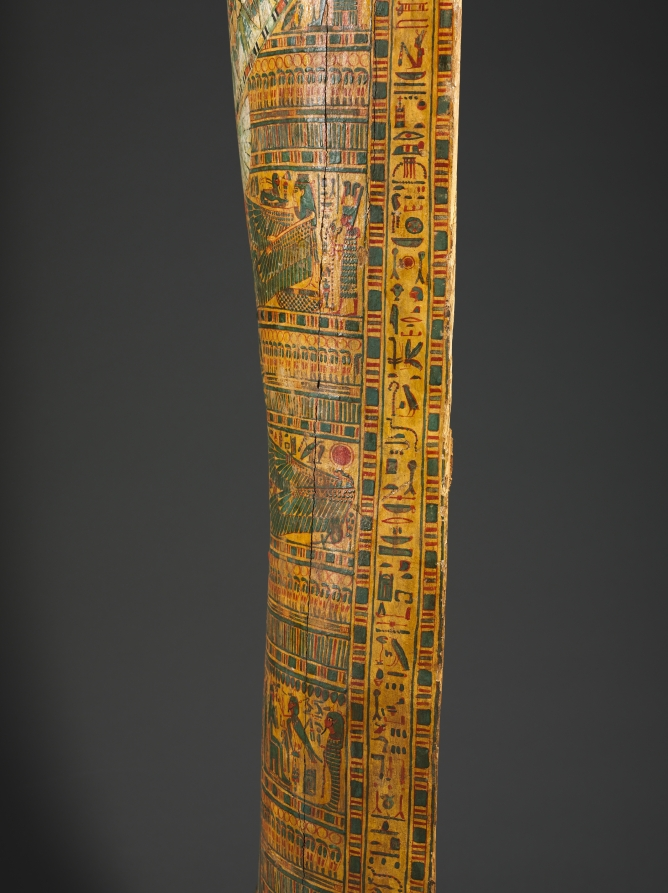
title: Coffin of Bakenmut (lid)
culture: Egypt, Thebes, Third Intermediate (1069–715 BCE), Dynasties 21–22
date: c. 1000–900 BCE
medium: gessoed and painted sycamore fig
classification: Funerary Equipment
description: The coffin of Bakenmut is one of the finest examples of painted wooden coffins made for the priests of Amen and their families at Thebes during Dynasty 21 and early Dynasty 22. The pharaohs of this time were no longer buried in the Valley of the Kings, but instead built tombs in the Delta, far to the north, where they resided. Security was lax in the Theban necropolis. The coffins and funerary goods of the wealthy citizens of Thebes were placed in unmarked and undecorated family tombs cut into the cliffs on the west bank of the Nile. All the care and detail that in more prosperous times were devoted to the decoration of the tomb chapel were now lavished on the elaborately painted coffins. Every available surface is crowded with religious scenes, images of funerary gods and goddesses, protective spells, and magical symbols. The deceased appears mummiform. An elaborate floral collar entirely covers the upper body, exposing only the separately attached hands (now lost). A pair of red "mummy braces" are crossed over the chest, their point of intersection marked by a winged sun disk. The lower body is covered with tiny figures modeled in gesso against a yellow background, which gives the effect of gold inlaid with glass or semiprecious stone. The decoration on the interior features two deified dead kings of Dynasty 18. Although these rulers had lived centuries before, memory of their greatness was still very much alive. The main scene near the top depicts Tuthmosis III, the great military pharaoh, who lived 500 years before Bakenmut. Posed as a mummy, the ruler wears a brilliant feathered garment enfolding him with falcon’s wings. The scene below features back-to-back seated images of Amenhotep I, regarded as the patron of the Theban cemetery and worshiped as a local god there.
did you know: Originally another smaller coffin was placed inside this outer coffin and in that the deceased with a mummy board would have rested.